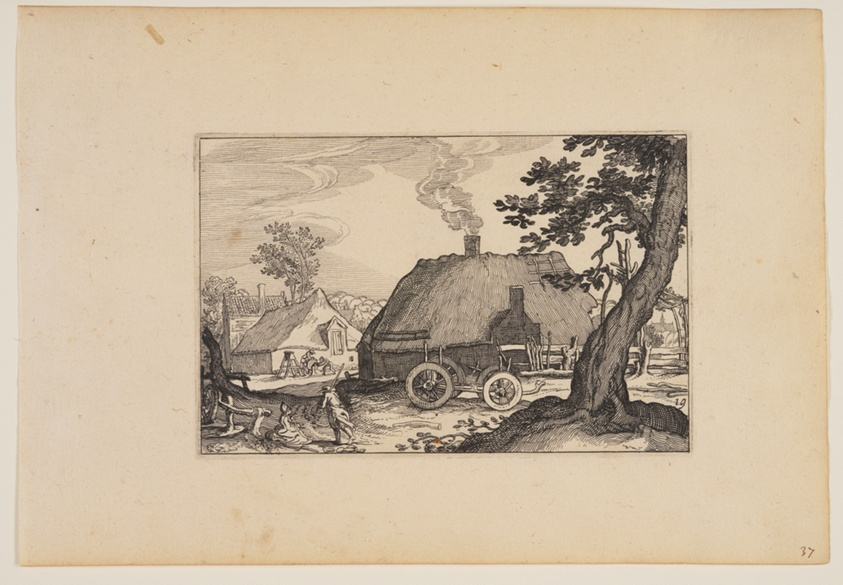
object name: Print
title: Farms, Chassis of a Cart in Centre, from Landscapes (Verscheyden aerdige Lanthuysen...)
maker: Claes Jansz. Visscher (Netherlandish, c. 1550–c. 1612); after Abraham Bloemaert (Dutch, 1566–1651)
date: 1620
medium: Etching on ivory laid paper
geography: Netherlands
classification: print; paper; prints and drawing; etching